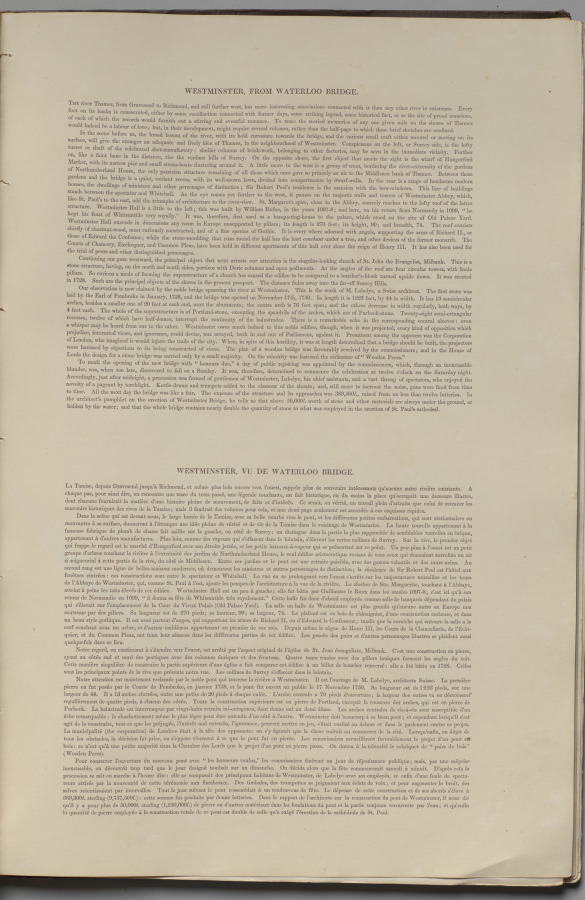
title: London As It Is: Westminster, from Waterloo Bridge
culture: England, 19th century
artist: Thomas Shotter Boys (British, 1803–1874)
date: 1842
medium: lithograph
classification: Bound Volume